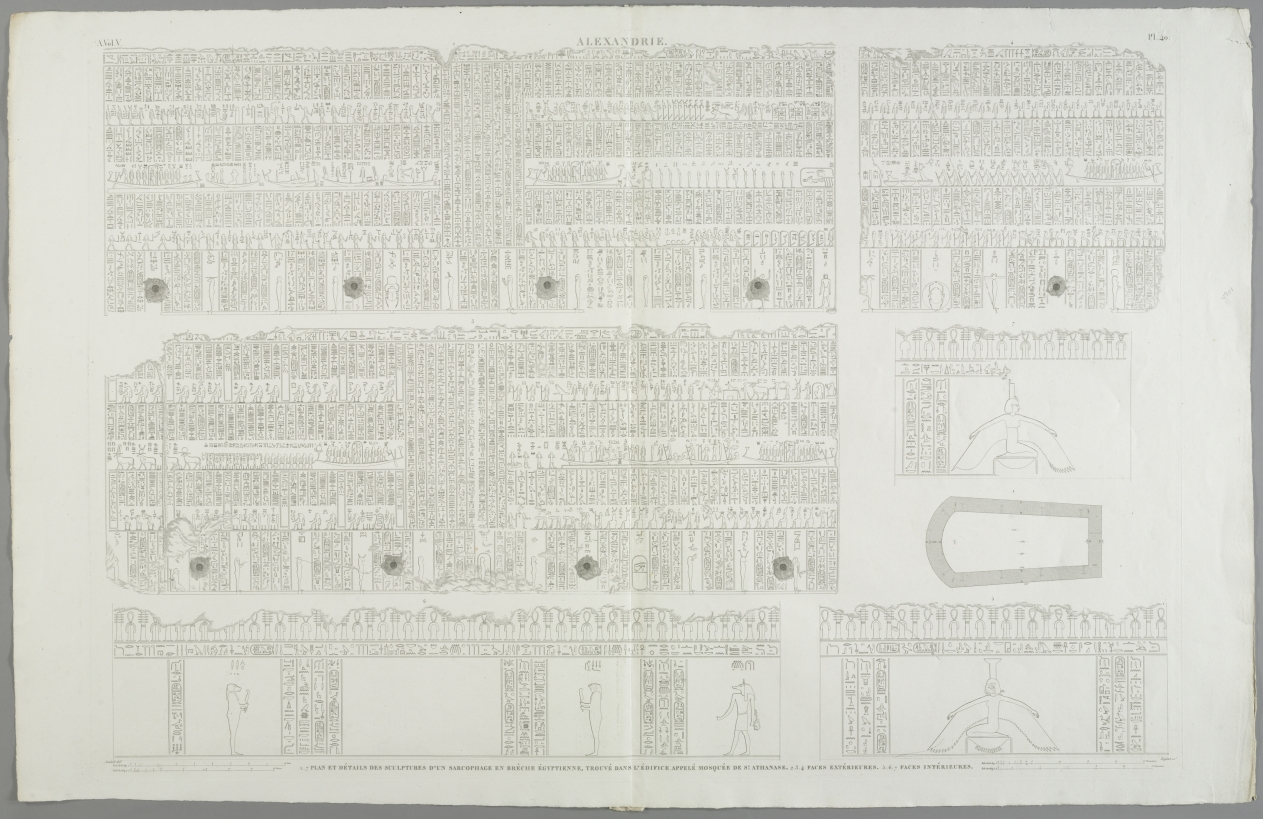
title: Description of Egypt: Memphis and Environs, Alexandria, Vol. V, Pl. 40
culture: France, 19th century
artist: Baptiste Bigant (French)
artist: after Edmé-François Jomard (French, 1777–1862/63)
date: c. 1822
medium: etching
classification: Print